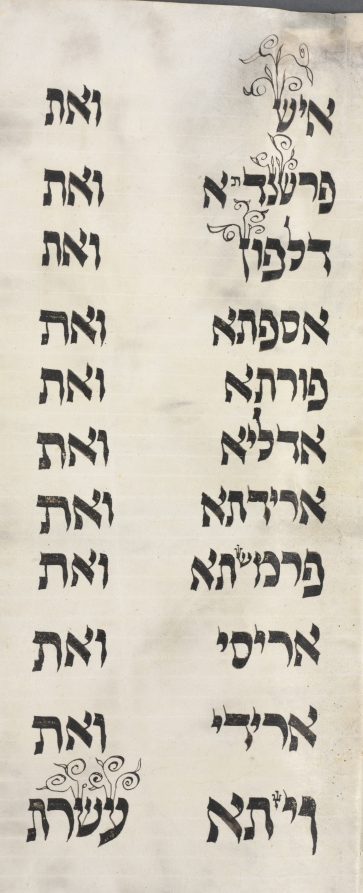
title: Scroll of Esther for the Purim Festival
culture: Europe (Eastern?), Hebrew, 19th century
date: c. 1850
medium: ink on vellum (eight columns, 39 lines of text on three membranes)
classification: Manuscript